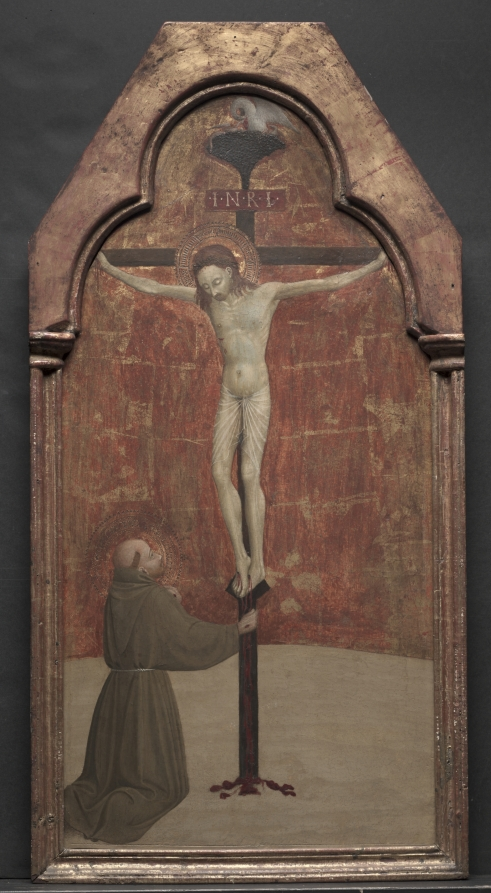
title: St. Francis Kneeling before Christ on the Cross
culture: Italy, 15th century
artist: Sassetta (Italian, 1392–1450)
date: 1437–1444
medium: tempera and gold on wood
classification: Painting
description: Because of his simplicity, piety, and devotion to all living creatures, Saint Francis (1181–1226) has remained among the most revered and popular saints. Born to wealthy parents in Assisi, he first lived a life of spendthrift luxury. However, Francis later gave up all worldly goods and embraced an existence of utter poverty. Throughout his adult life, the saint experienced mystical trances and visions of Christ. Atop the cross here is a leafy tree and a nest of pelicans. Fifteenth-century viewers would have recognized the tree as a reference to the cross, which is often described as a tree, symbolizing Christ's role as the source of eternal life. The pelican, shown nourishing its young with its own blood, symbolizes Christ, who sacrifices himself for the salvation of mankind. This painting was the center pinnacle on the back of a double-sided altarpiece made for the church of San Francesco in Borgo Sansepolcro (near Arezzo).